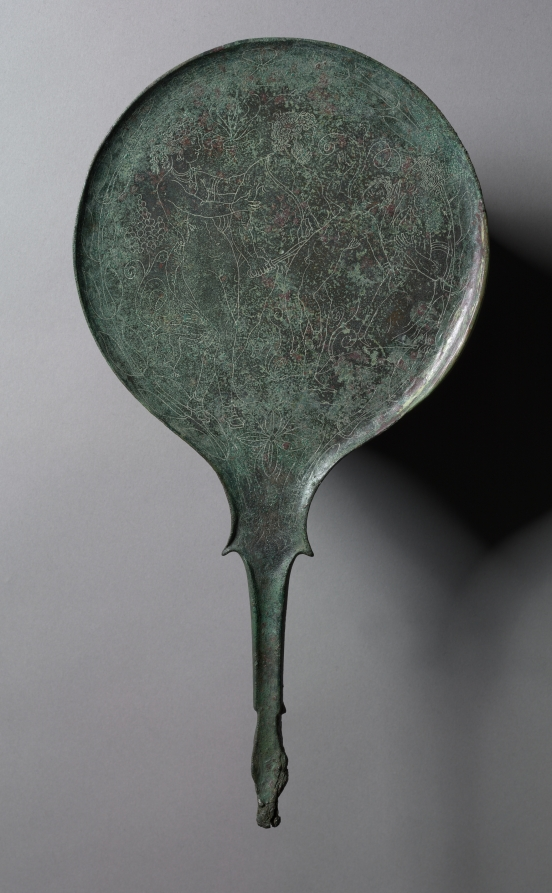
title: Mirror with Engraved Scene: Man Threatening Child (Telephos and Orestes?)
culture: Italy, Etruscan, probably Praenestine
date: c. 330–300 BCE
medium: bronze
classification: Metalwork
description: Cast in one piece, this bronze mirror features a handle terminating in a stylized deer head. The front side of the disc, once highly polished and reflective, would have served as a mirror, while the reverse—now on display—features an engraved figural scene. Best observed with the aid of a line drawing, this shows a bearded man holding a small child whom he threatens with his sword. Although it lacks inscriptions and certain expected iconographical features, this scene may represent the wounded warrior Telephos holding the young Orestes hostage as he sought a cure for an unhealing wound. The older woman kneeling at right may be the boy's nursemaid, while the nude young woman restraining the man could represent Lasa, an Etruscan nymph-like guardian figure.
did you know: The largely unadorned front side of this mirror would have been highly polished and reflective.